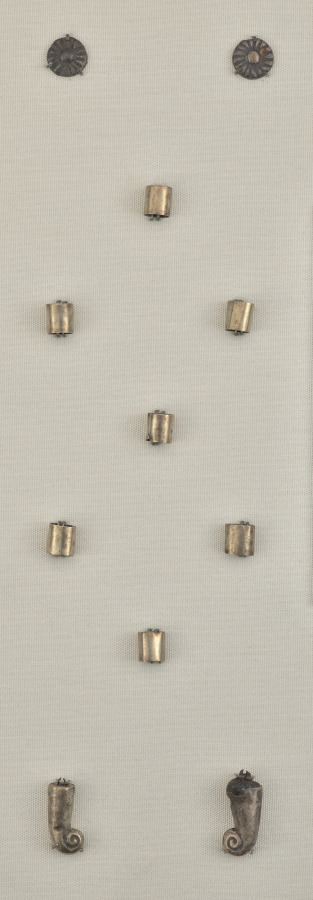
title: Sidelocks and Elements of Wig Decoration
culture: Egypt, Middle Kingdom (2040–1648 BCE), Dynasty 12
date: 1980–1801 BCE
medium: Electrum (?) over a calcite gesso; silver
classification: Jewelry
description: Elite Egyptian people once elaborately styled their hair or wore costly wigs to show their status. To further beautify their locks, women and men alike wove or sewed ornaments into their wigs or onto textiles draped over them. While most historical Egyptian wigs disintegrated over centuries, sculptures and friezes show how people wore these shining ornaments. Made from silver, curved sidelock pendants attached to braid ends or dangled on the forehead. Also of silver, tubes slid over braids or sectioned hair. Floral rosettes could have been sewn throughout, adding visual interest and reflecting the light with their faceted surfaces. While acquired together, these ornaments weren’t necessarily part of a set.